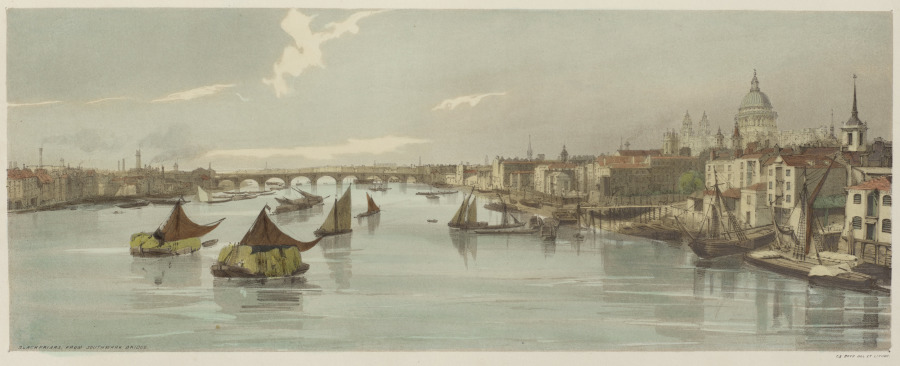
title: London As It Is: Blackfriars, from Southwark Bridge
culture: England, 19th century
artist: Thomas Shotter Boys (British, 1803–1874)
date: 1842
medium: lithograph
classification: Bound Volume